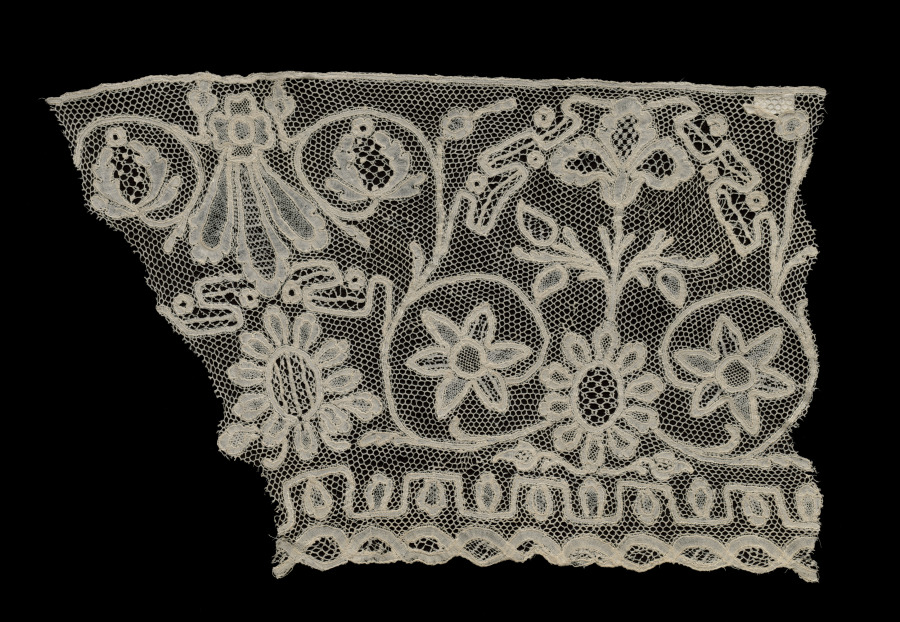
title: Fragment of Lace Flounce made into a Cuff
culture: Flanders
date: 1600s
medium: Linen: bobbin lace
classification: Lace